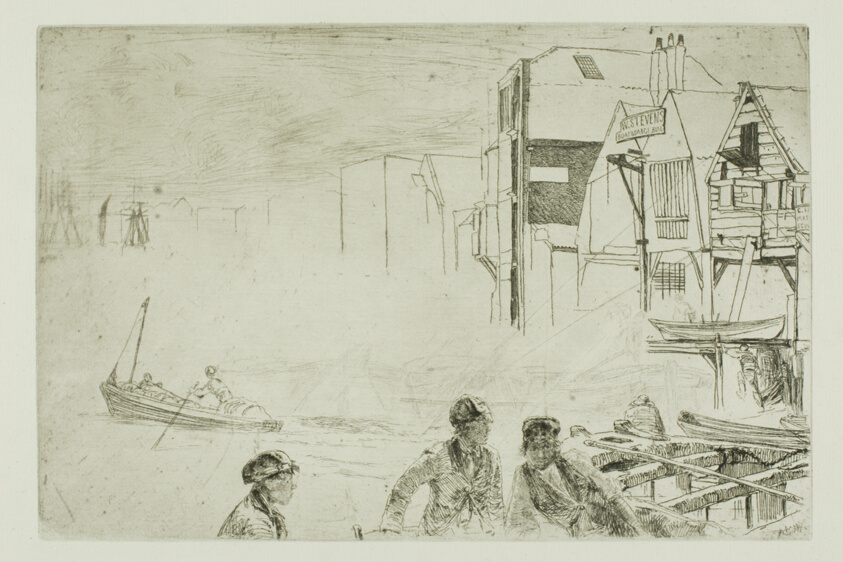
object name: Print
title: Stevens' Boat Yard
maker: James McNeill Whistler (American, 1834-1903)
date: 1859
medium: Etching and drypoint with foul biting in black ink on ivory laid paper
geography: United States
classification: etching; foul biting; print; prints and drawing; drypoint; paper